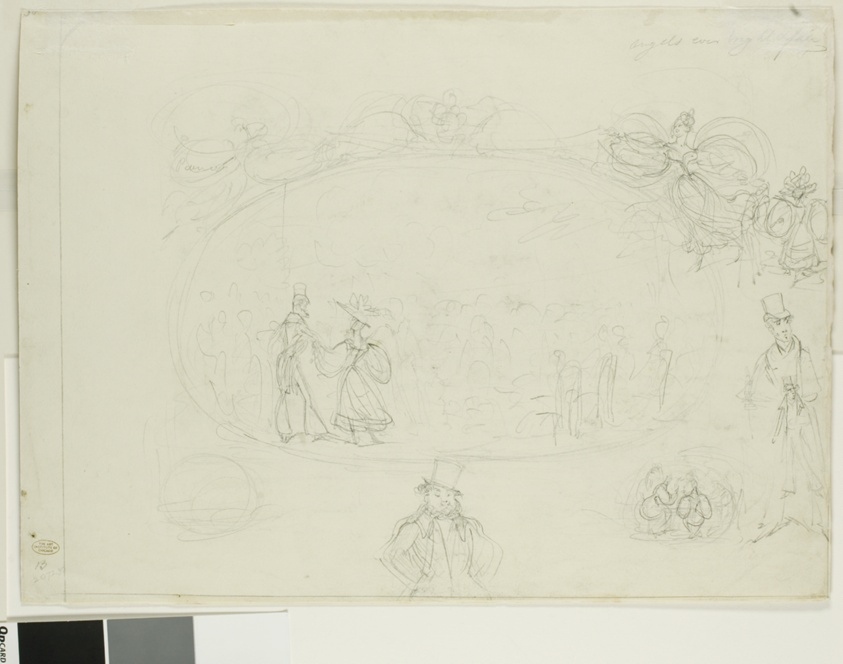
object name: Drawing and Watercolor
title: Fashions and Frights of 1829 (recto); Angels Ever Bright and Fair (verso)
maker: George Cruikshank (English, 1792-1878)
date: 1829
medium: Graphite with brush and watercolor (recto) and graphite (verso) on ivory wove paper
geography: England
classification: graphite; drawings (visual works); prints and drawing